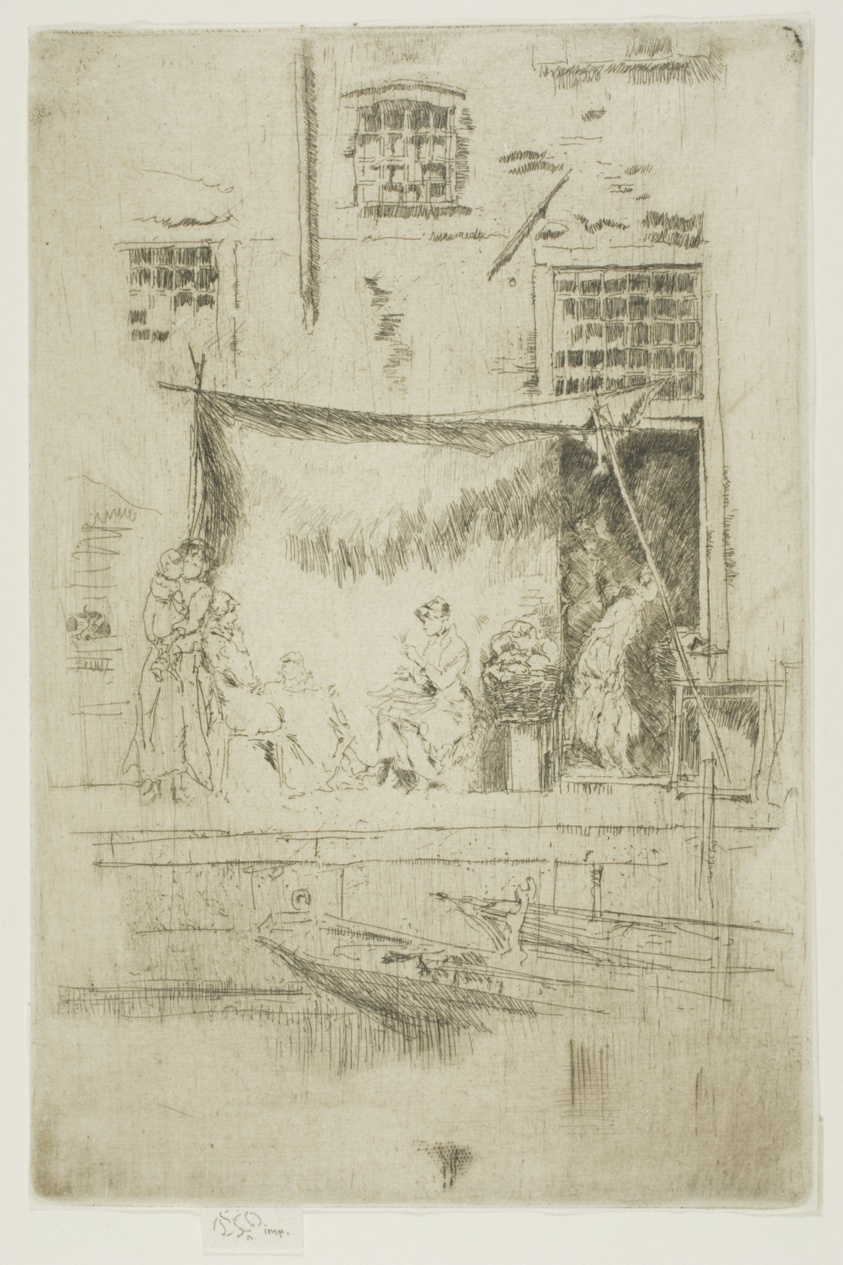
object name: Print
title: Fruit Stall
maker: James McNeill Whistler (American, 1834-1903)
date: 1879/80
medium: Etching and drypoint with foul biting in black ink on ivory laid paper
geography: United States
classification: etching; drypoint; foul biting; print; prints and drawing; paper